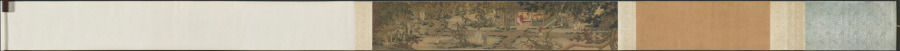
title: The Nine Elders of the Mountain of Fragrance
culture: China, Ming dynasty (1368–1644)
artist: attributed to Xie Huan (Chinese, c. 1370-c.1450)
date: 1426–52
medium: handscroll, ink and color on silk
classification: Painting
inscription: 4 seals: 2 of Xiang Yuanbian 項元汴 (1525–1590); 1 of the Qianlong Emperor (r. 1736-95); 1 of C. C. Wang 王季遷 (1907–2003)